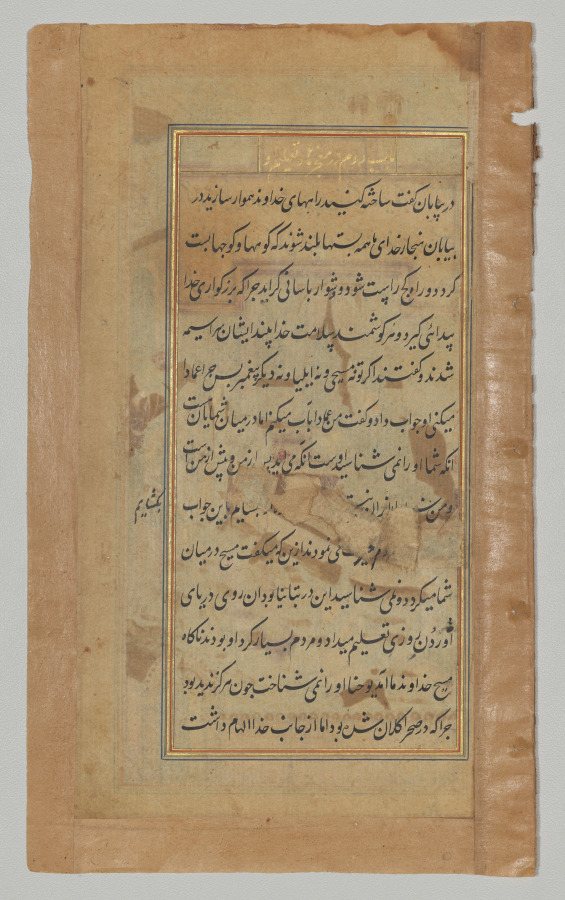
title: John the Baptist recognizes Christ by the appearance of a dove (folio 50 verso), from a Mirror of Holiness (Mir’at al-quds) of Father Jerome Xavier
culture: Mughal India, Allahabad, made for Prince Salim (1569–1627)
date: 1602–4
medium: Gum tempera, ink, and gold on paper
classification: Manuscript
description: Wearing the black robes and cap of a Jesuit priest, John the Baptist sits in a well-appointed Mughal-style courtyard. According to Father Jerome’s text, John recognizes Jesus by the dove who sits on his head. Possibly Father Jerome intended to relate the Gospel account that describes the dove of the Holy Spirit as hovering in the air above his head. The artist’s own reactions to this passage may be reflected in the expressions and gestures of the onlookers, who seem incredulous and bemused at this sign.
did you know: Jesus holds a rosary with a cross even in scenes prior to his crucifixion.